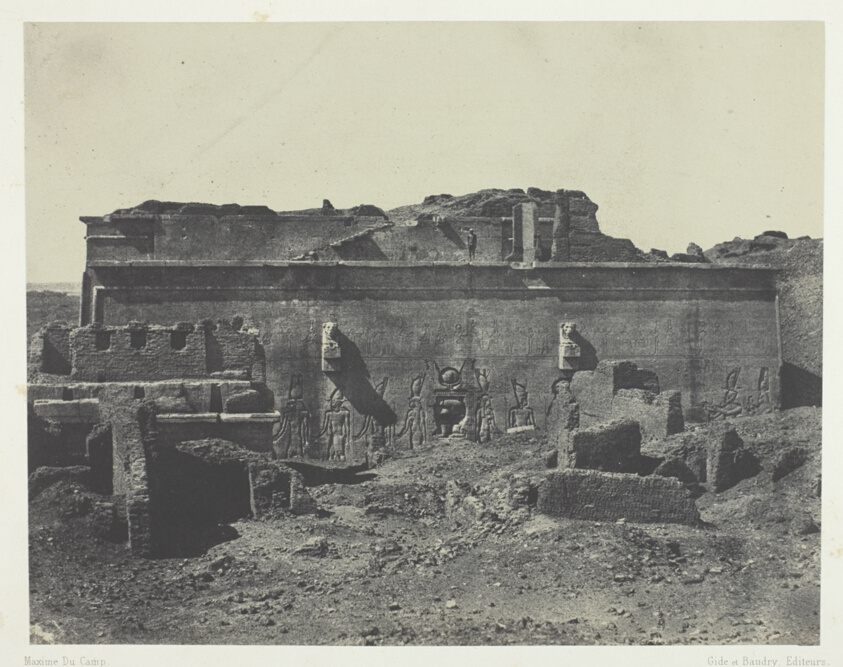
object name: Photograph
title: Façade Postérieure, Grand Temple de Dendérah (Teutyres), Haute Egypte, plate 18 from the album "Egypte, Nubie, Palestine et Syrie" (1852)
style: 19th century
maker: Maxime Du Camp (French, 1822–1894)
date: 1849/51, printed 1852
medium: Salted paper print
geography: France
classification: salted paper print; photographic process; photography; photograph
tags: Collected by Hugh Edwards, Egypte, Nubie, Palestine et Syrie